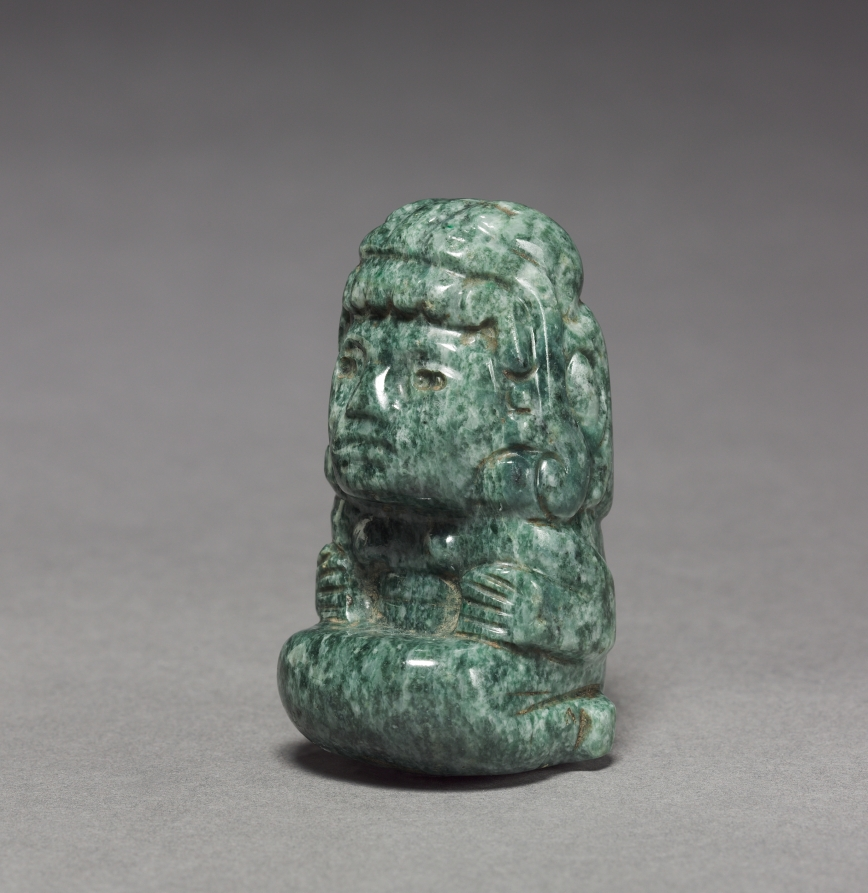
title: Female Figurine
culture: Central Mexico, Aztec, Post-Classic Period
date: 1325–1519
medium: jadeite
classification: Stone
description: Seated in typical female posture, this figurine probably represents an Aztec goddess or ritual impersonator. She wears a monster headdress, but her costume is simple, making specific identification difficult.